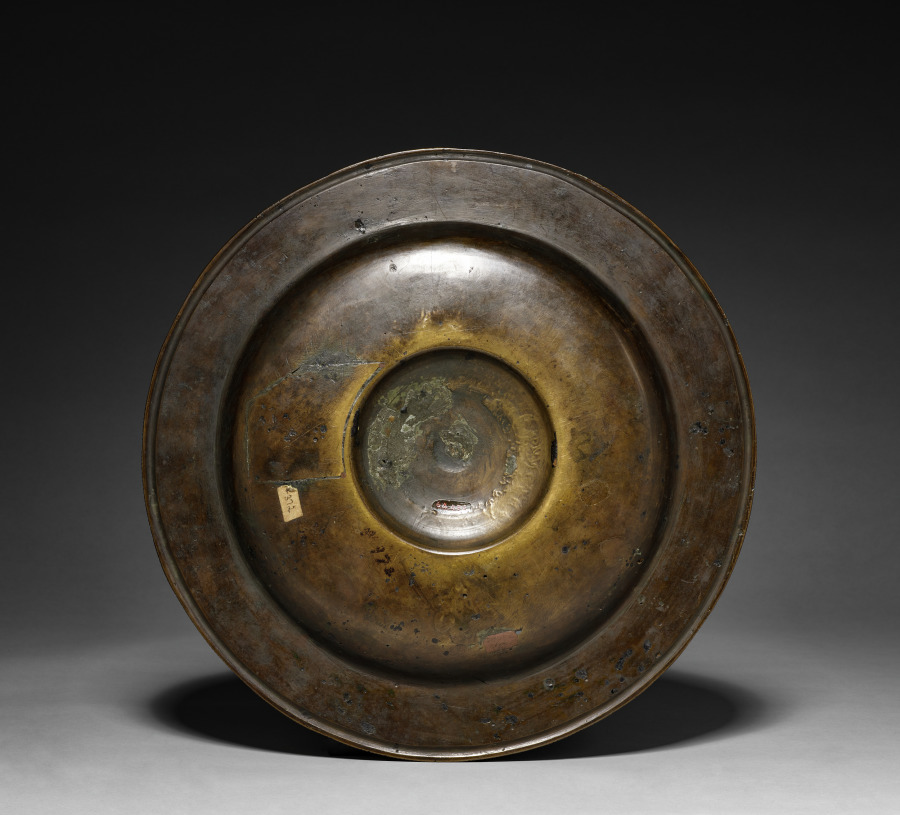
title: Platter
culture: Germany, early 17th century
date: early 1600s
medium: bronze, golden brown patina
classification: Metalwork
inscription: on front: "TEMPERANTIA."